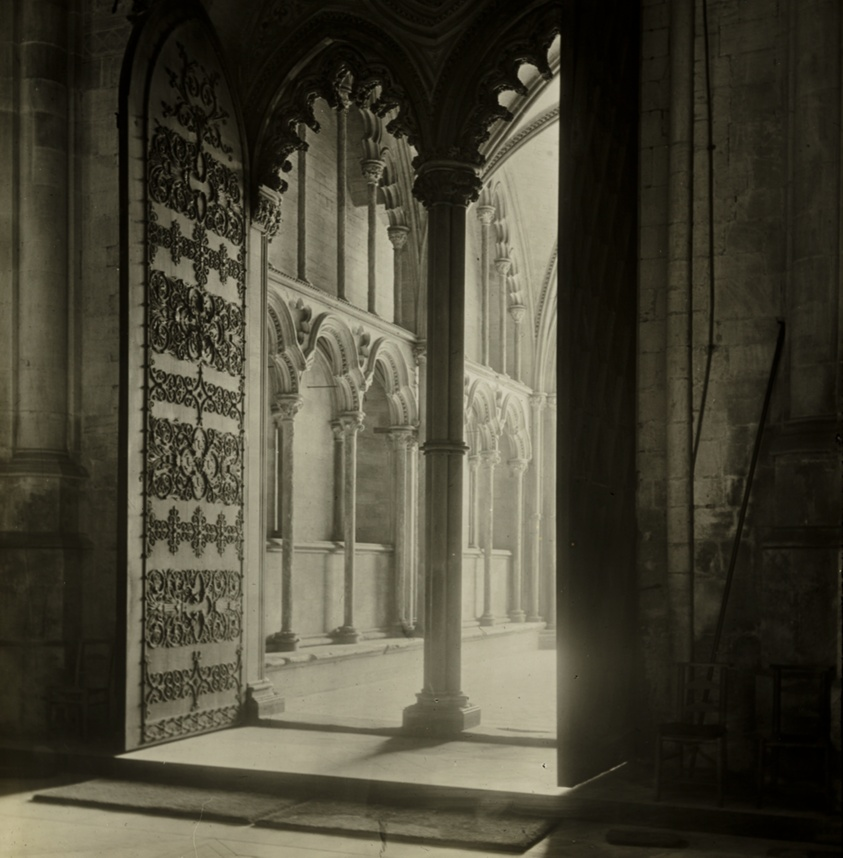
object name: Photograph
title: Ely Cathedral: Galilee Porch from Nave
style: Pictorialism, 19th century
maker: Frederick H. Evans (English, 1853–1943)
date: c. 1891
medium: Lantern slide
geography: England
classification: photograph; photography